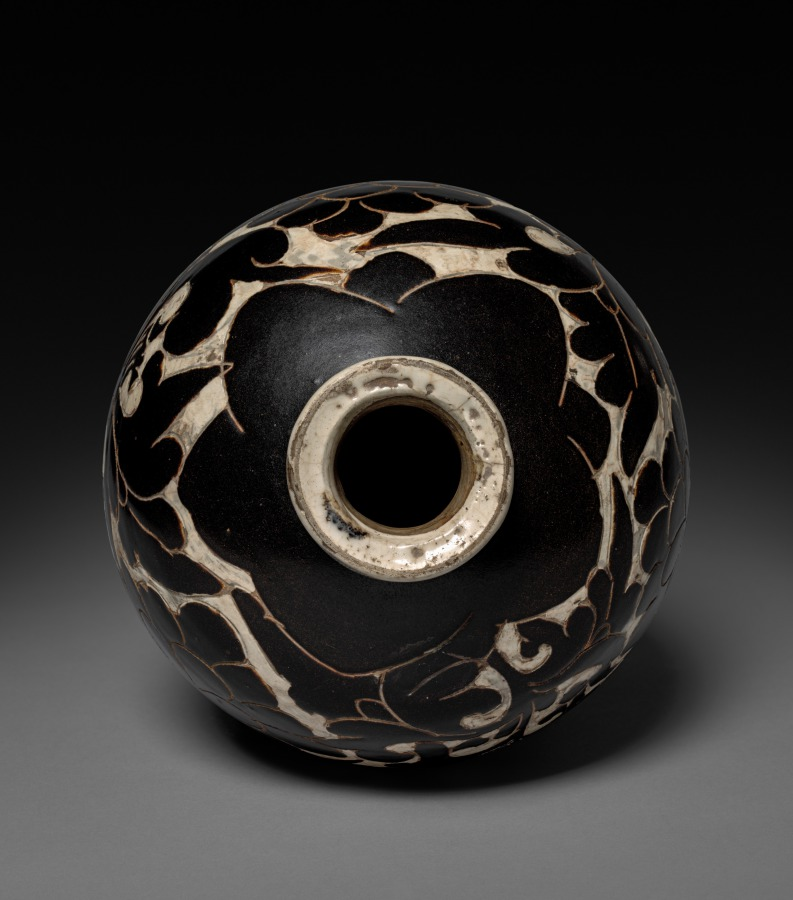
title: Vase with Peony Decoration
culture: China, Northern Song dynasty (960-1127)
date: 1000s-1100s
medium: Gray stoneware with underglaze slip decoration, Cizhou ware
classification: Ceramic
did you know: The thick foot rim is unglazed, while the shallow recessed flat base is covered with white slip and chance accumulations of underglaze pigment.